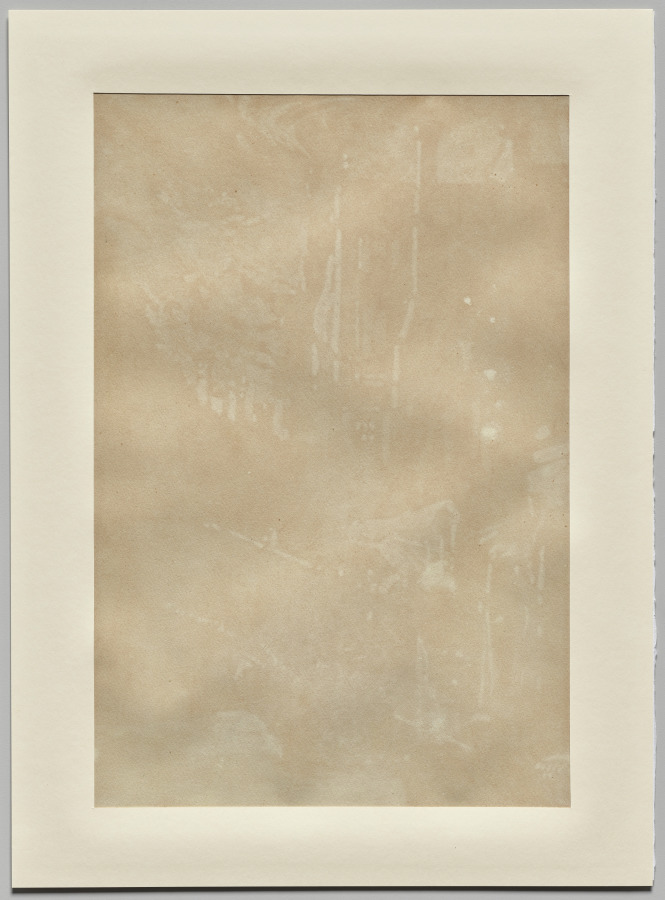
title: A Canal, Venice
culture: England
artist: James Holland (British, 1800–1870)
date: 1800–1870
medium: graphite and watercolor, heightened with white on buff paper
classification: Drawing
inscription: Signed with initials and inscribed "JH/Venice" center right, on bridge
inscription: inscribed “A. Light. Fresco” on building upper left.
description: Venice was one of the primary subjects of the British artist James Holland, and his works satisfied the 19th-century popular imagination of a romantic Venice, with its sun-kissed buildings, gondolas, and quaint bridges. The present sheet was executed during a trip to Venice in 1857. Holland worked on a buff-colored sheet of paper, sketching the composition in graphite, and then painting with watercolor in rust, pink, grey, and aqua, and light blue and white opaque watercolors. The unfinished section on the side of the palazzo at upper left suggests that this drawing was kept by Holland in his studio for his own reference or pleasure.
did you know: Opaque watercolor, also called gouache, or bodycolor, is watercolor paint made opaque with the addition of chalk, white pigment, or white paint.